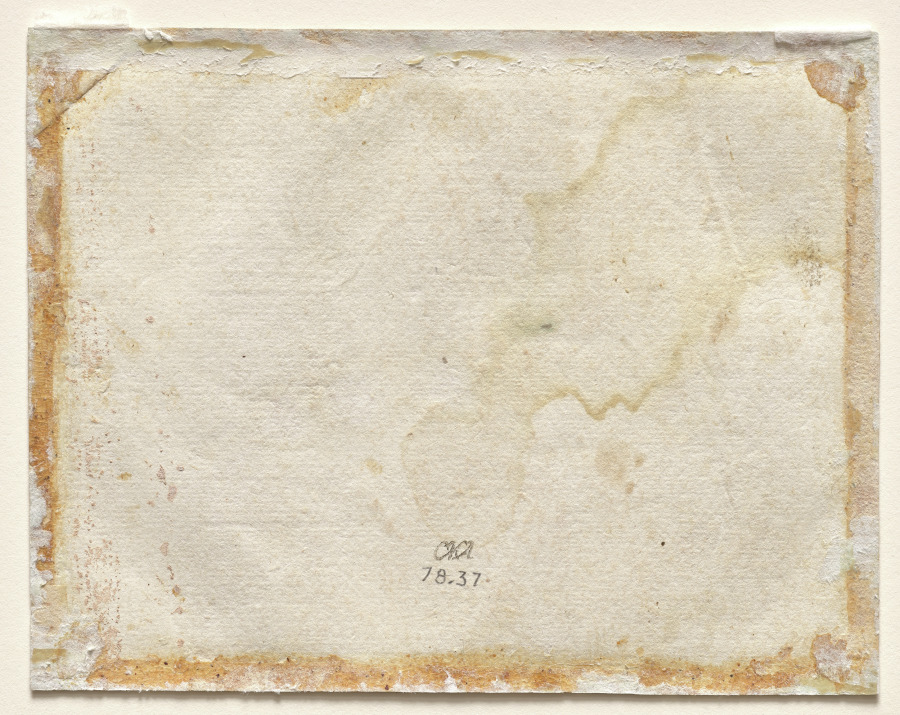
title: Studies of a Seated Female, Child's Head, and Three Studies of a Baby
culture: Italy, 16th century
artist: Raphael (Italian, 1483–1520)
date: c. 1507–8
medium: metalpoint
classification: Drawing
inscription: lower right, in brown ink: 74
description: This drawing is from Raphael’s "pink sketchbook," comprised of ten sheets of roughly equal size that each portray variations of a mother and child. Today, six of the drawings at the Palais des Beaux-Arts, Lille; two are at the British Museum; one is in a private collection; and one is in Cleveland. The small format of the sheets would have enabled the artist to carry the notebook as he traveled from Florence to Rome in 1508. Raphael used metalpoint, a technique popular in 15th- and early 16th-century Italy on a pink prepared surface. The pose of the infant's head in the drawing was based on that of the Christ child in Leonardo da Vinci's Benois Madonna, then in a private collection in Florence, with changes—such as the uplifted eyes and open mouth—made by Raphael. The curving back of the female nude is echoed in the roundness of the child's head. The three sketches of a reclining infant at the bottom of the sheet are freely handled and improvisational, relaying the child's squirming, continuous movement with repeated contour lines.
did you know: This sheet was probably once part of a sketchbook carried by the artist Raphael on a 1508 journey between Florence and Rome.